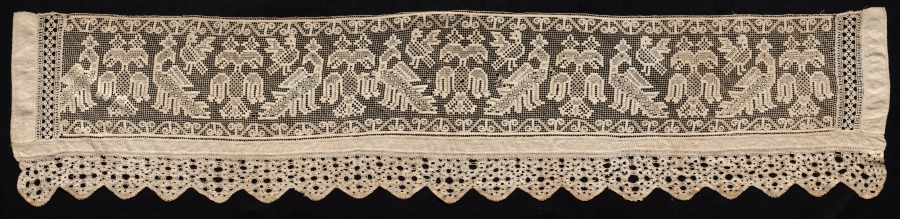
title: Border with Crowned and Double-Headed Birds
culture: Russia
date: 1700s–1800s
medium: Needle lace, filet/lacis (knotted ground and darned in one direction) and bobbin lace (tape lace) edging; bleached linen (est.)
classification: Lace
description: This long border may have functioned as a valance, a decorative drapery made for attachment at the frame of the bed. Crowned double-headed eagles confront peacocks, while smaller birds fly above them.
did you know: Handmade lace for marriage dowries was produced in large quantities in Russia during the eighteenth and nineteenth centuries.